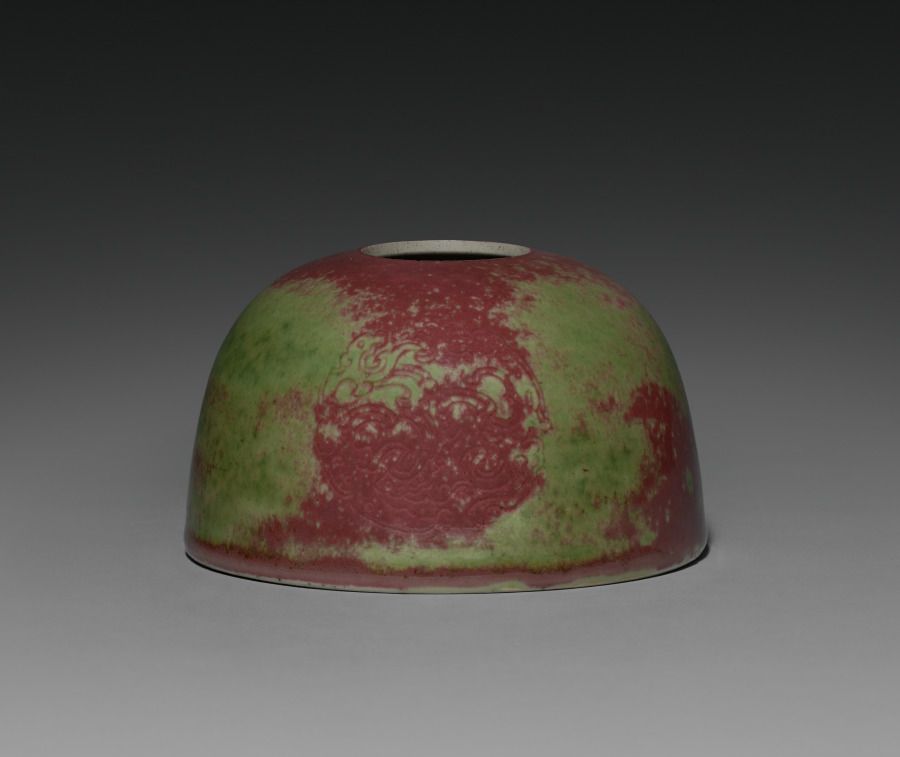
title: Water Pot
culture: China, Jiangxi Province, Jingdezhen, Qing dynasty (1644–1911), Kangxi period (1662–1722)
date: 1662–1722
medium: porcelain with "peach bloom" glaze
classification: Ceramic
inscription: 大清康熙年制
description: The "peach-bloom" glaze developed during the Kangxi era has been described as "drunken with beauty." The water pot's glaze is in shades ranging from red to grayish rose. The interior and base are covered in white glaze.